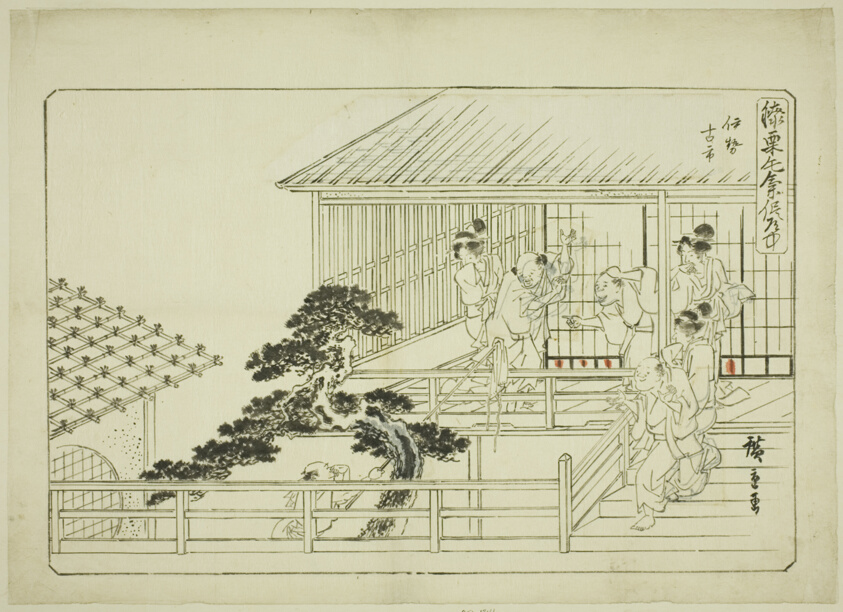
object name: Drawing and Watercolor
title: Untitled Drawing, for the series English Title (Hizakurige kimama dôchû)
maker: Utagawa Hiroshige 歌川 広重; Japanese, 1797-1858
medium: Ink and red pigment on paper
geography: Japan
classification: woodblock print; print; asian art